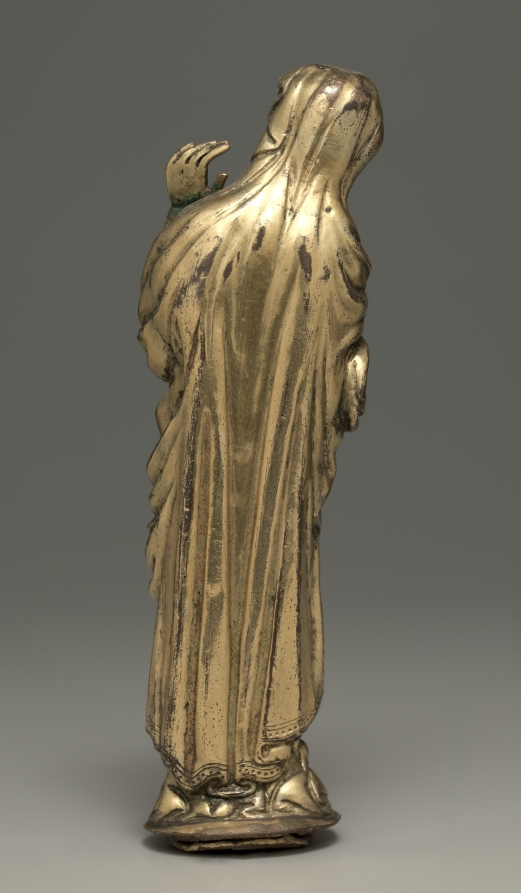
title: Mourning Virgin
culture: Austria, Upper Rhine, 15th century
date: early 1400s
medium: gilt copper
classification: Sculpture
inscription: These small statuettes would have originally flanked a crucifix as suggested by this arrangement. According to the Gospels, the Virgin and Saint John were present on Golgotha at Christ’s death. Medieval artists frequently depicted them standing next to the cross.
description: These small statuettes would have originally flanked a crucifix as suggested by this arrangement. According to the Gospels, the Virgin and Saint John were present on Golgotha at Christ’s death. Medieval artists frequently depicted them standing next to the cross.